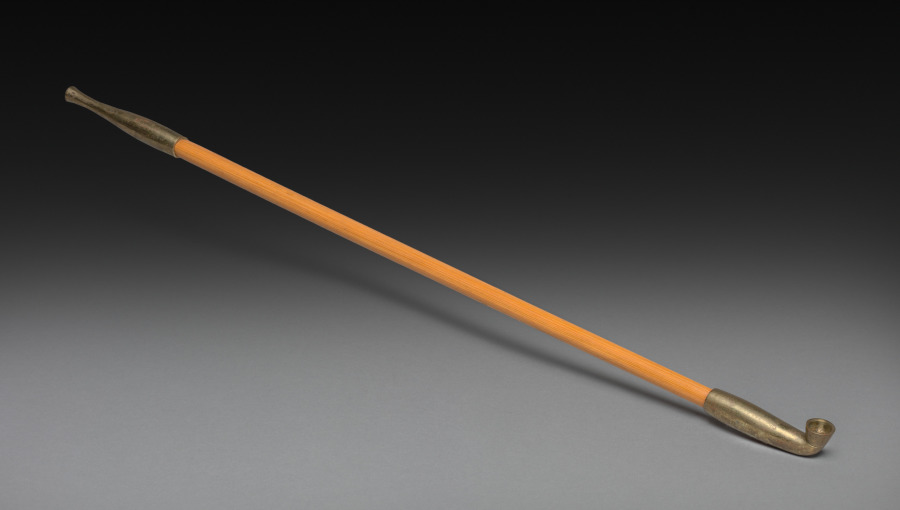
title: Tobacco Pipe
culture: Japan, Edo period (1615–1868)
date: 1700s–mid-1800s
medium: wood and metal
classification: Miscellaneous